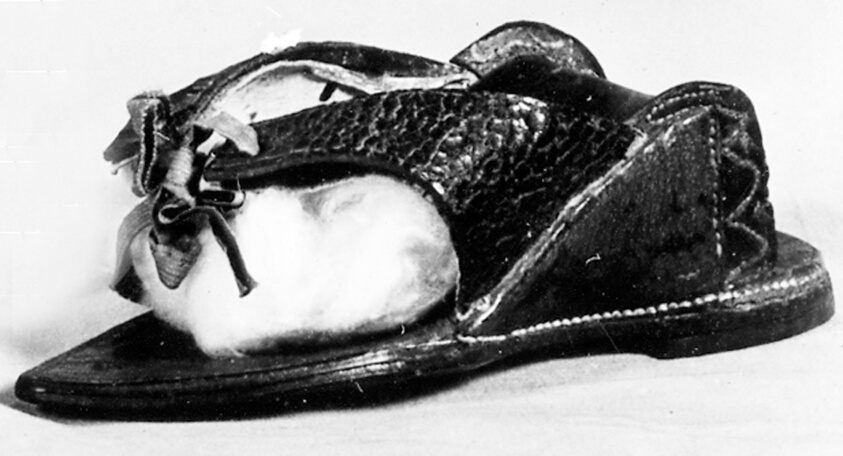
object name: Textile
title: Patten (Overshoe)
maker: England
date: 1801/25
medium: Leather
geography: England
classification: textile; shoes - misc; costume accessory - shoe